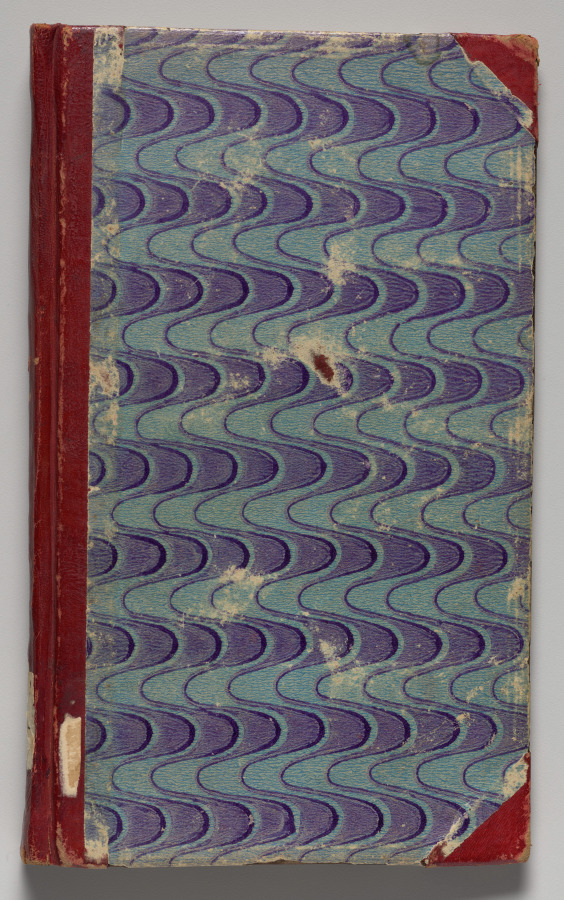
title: Mirror of Holiness (Mir’at al-quds) of Father Jerome Xavier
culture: Mughal India, Allahabad, made for Prince Salim (1569–1627)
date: 1602–4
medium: 24 full size illustrations with 160 folios of text; gum tempera, ink, and gold on paper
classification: Manuscript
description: Father Jerome Xavier (1549–1617) of the Society of Jesus, also known as the Jesuit order of Catholic priests, spent 19 years as a guest at the Mughal court from 1595 until 1614. While in residence he learned the Persian language so that he could engage in theological discussions in the courts of Akbar and his successor, Jahangir. When Akbar requested a biography of Jesus, Father Jerome wrote the Mir’at al-quds in Persian prose. This text relates his version of the life and miracles of Jesus based on a number of canonical and apocryphal sources. He emphasized aspects of the life of Jesus that he thought would appeal to Akbar in the hopes of winning the emperor’s conversion to Christianity.